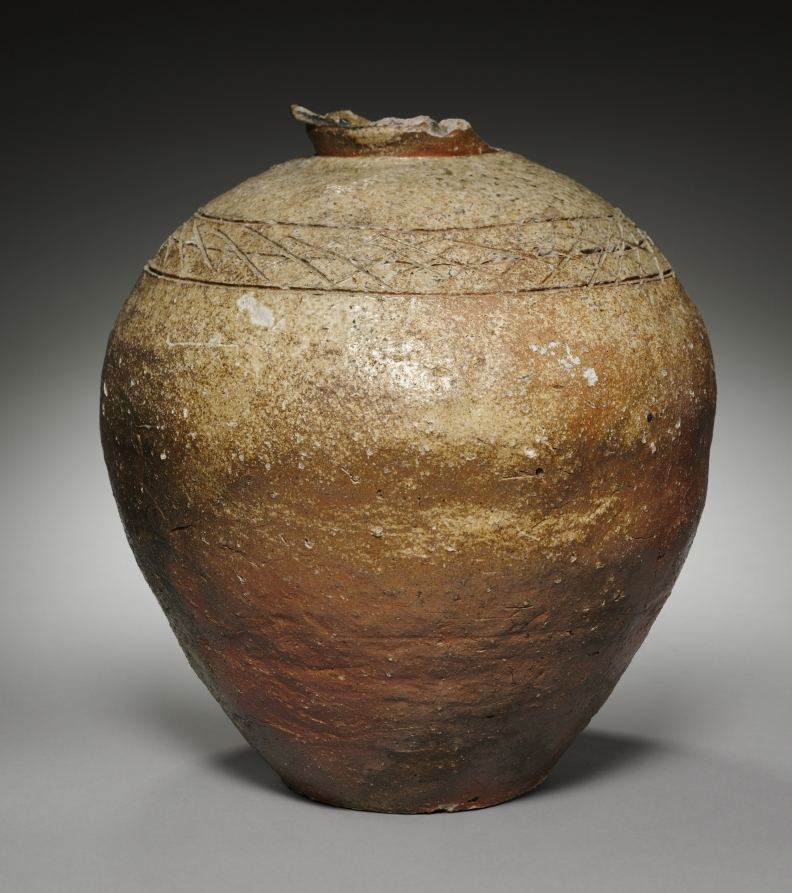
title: Storage Jar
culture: Japan, Muromachi period (1392–1573)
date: late 1300s–1400s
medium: Stoneware with natural ash glaze (Shigaraki ware)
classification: Ceramic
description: The red color of this jar comes from iron in the clay. Natural ash glaze settled on the vessel during firing. The rim would have been complete with a slightly flared lip. Around the collar is an incised pattern resembling cypress fences, a common scene in the Japanese landscape. Intended for grain storage, rustic vessels like this one were also prized by tea enthusiasts, who appreciated the uncalculated beauty of the glaze and the asymmetry of these humble vessels.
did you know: This jar was probably made using a coiling method, where coils of clay are stacked atop each other and smoothed to form its structure.